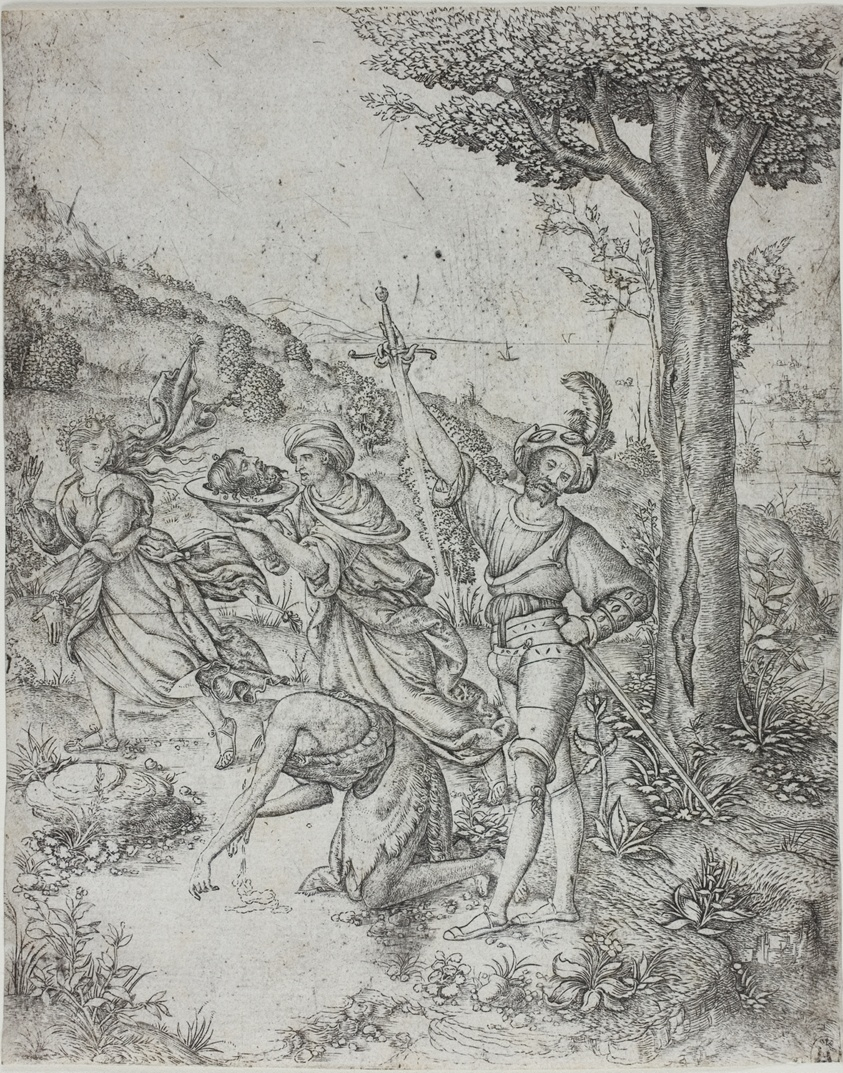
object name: Print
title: Beheading of St. John the Baptist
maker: Master of the Beheading of St. John the Baptist (Italian, active 1510-1520)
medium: Engraving in black on paper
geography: Italy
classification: engraving; print; prints and drawing